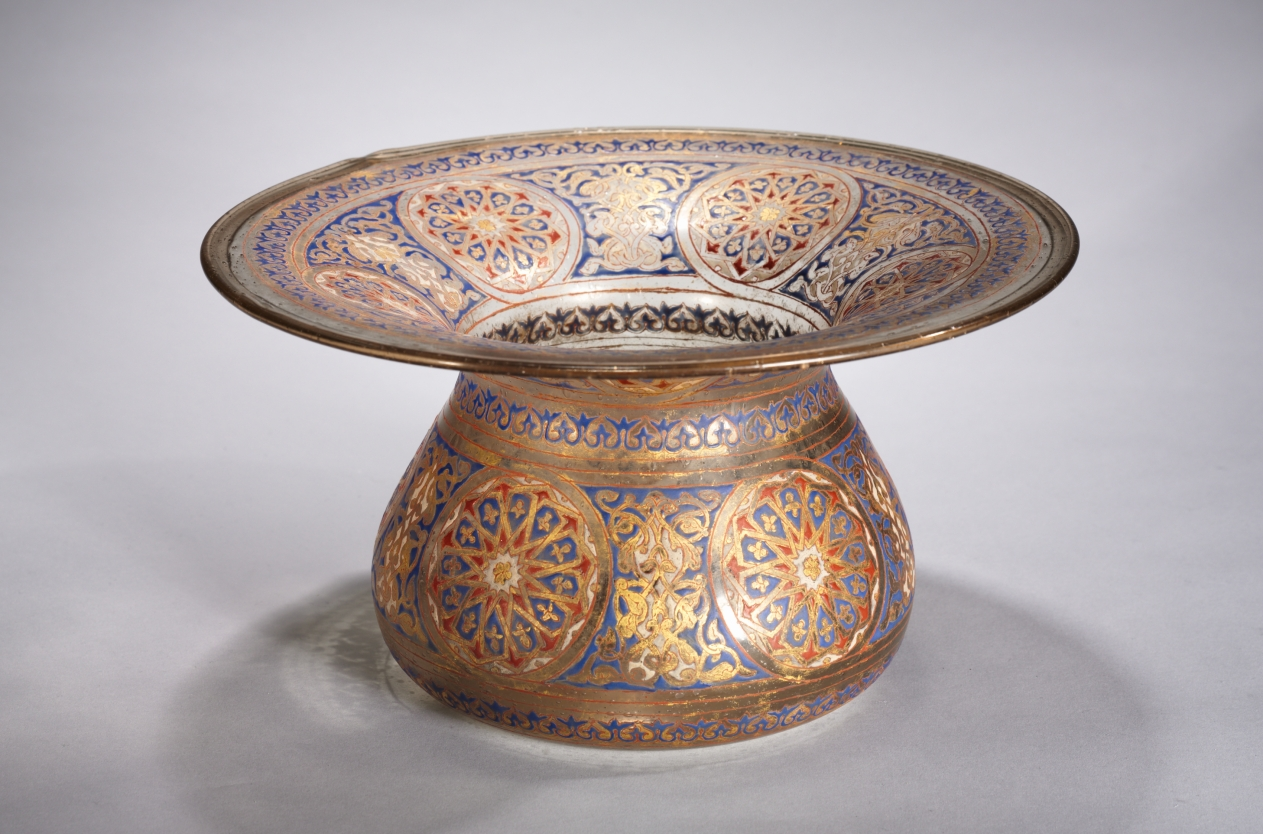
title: Ceremonial Spittoon or Basin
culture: Europe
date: late 1800s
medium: glass with enameled and gilded decoration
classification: Glass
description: This basin, as with the mosque lamp CMA 1981.10, is representative of reproductions of Mamluk glass that were prominent in the late 1800s in Europe during a period of resurgence of interest in Islamic art. At this time, collectors and artists revived the techniques of enameling and gilding that are hallmarks of Mamluk glass.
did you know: The intense enamel colors form striking star and leaf patterns.